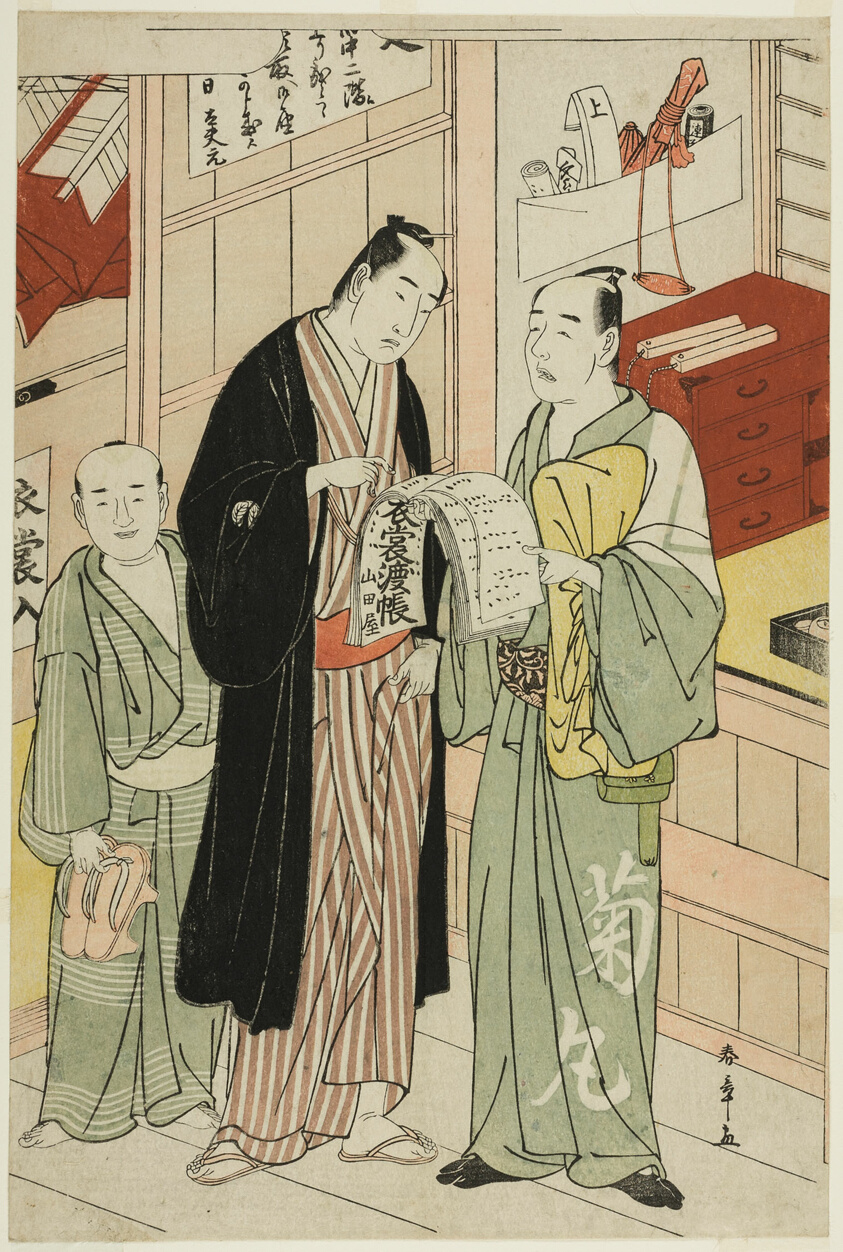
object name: Print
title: The Actor Onoe Matsusuke I in the Wardrobe Room of a Theater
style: Japanese (culture or style)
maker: Katsukawa Shunsho 勝川 春章; Japanese, 1726-1792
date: c. 1780/83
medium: Color woodblock print; oban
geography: Japan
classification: woodblock print; print; asian art